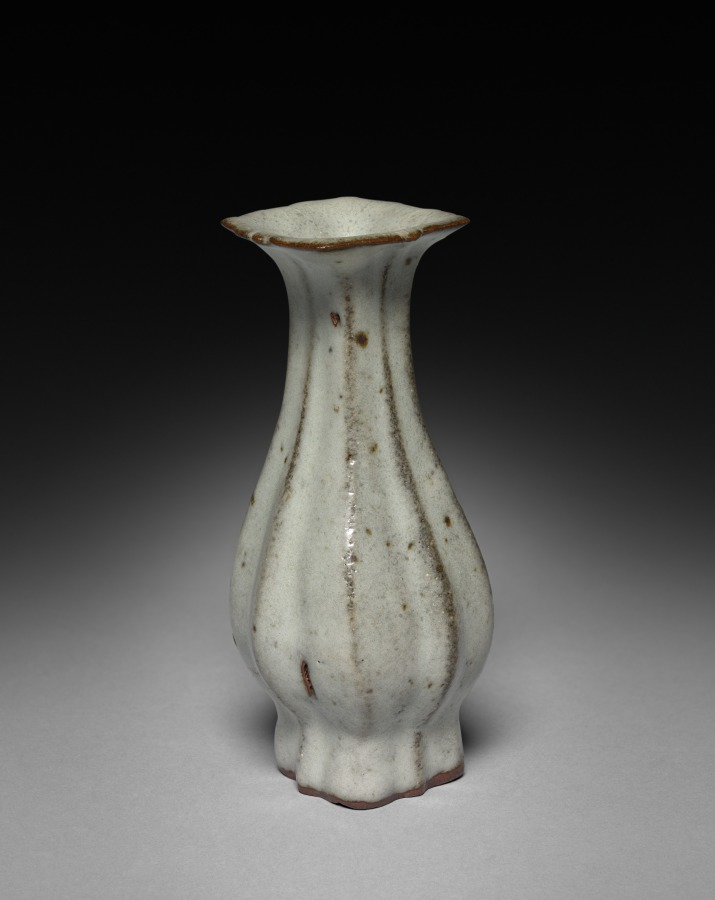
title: Lobed Vase: Guan ware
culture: China, Hangzhou, Suburban Altar Kiln, Southern Song dynasty (1127-1279)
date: 1127–1279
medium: glazed reddish-brown porcelain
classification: Ceramic